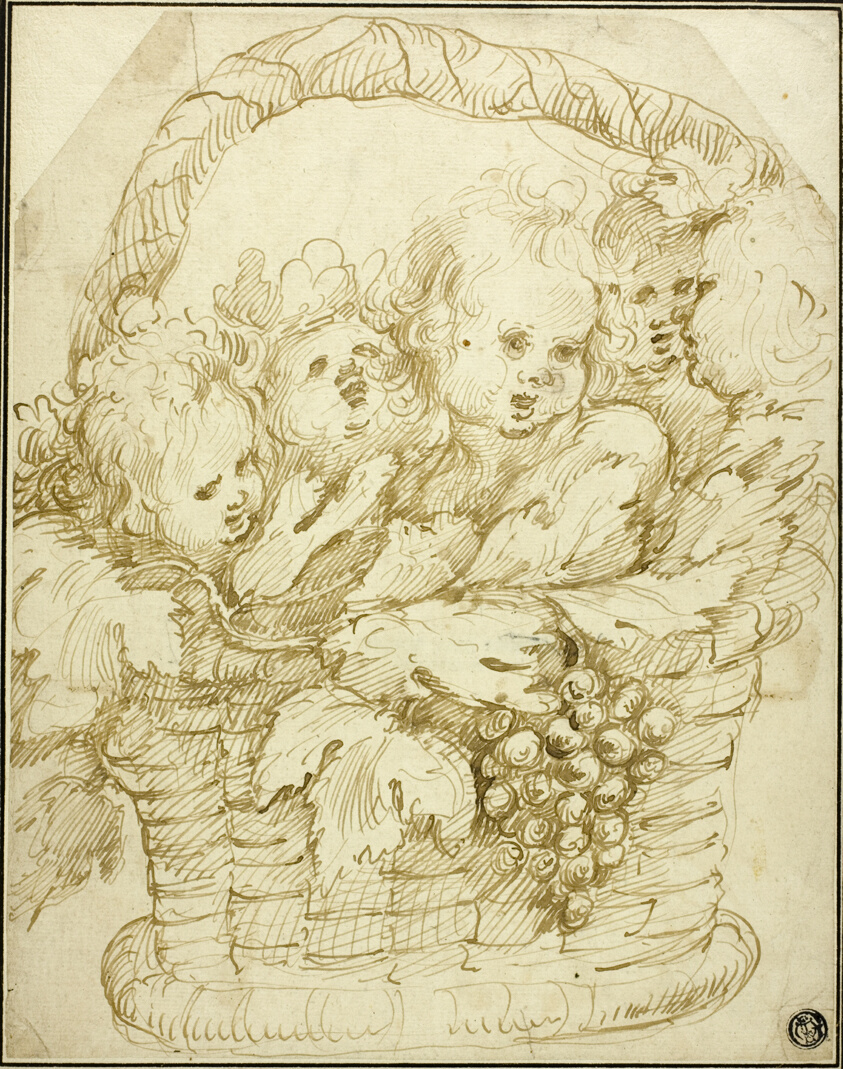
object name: Drawing and Watercolor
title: Basket of Cupids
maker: Attributed to Jan Boeckhorst; Flemish, born Germany, about 1604–1668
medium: Pen and brown ink on ivory laid paper, laid down on ivory laid paper (chine collé)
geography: Flanders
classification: pen and ink drawings; drawings (visual works); prints and drawing